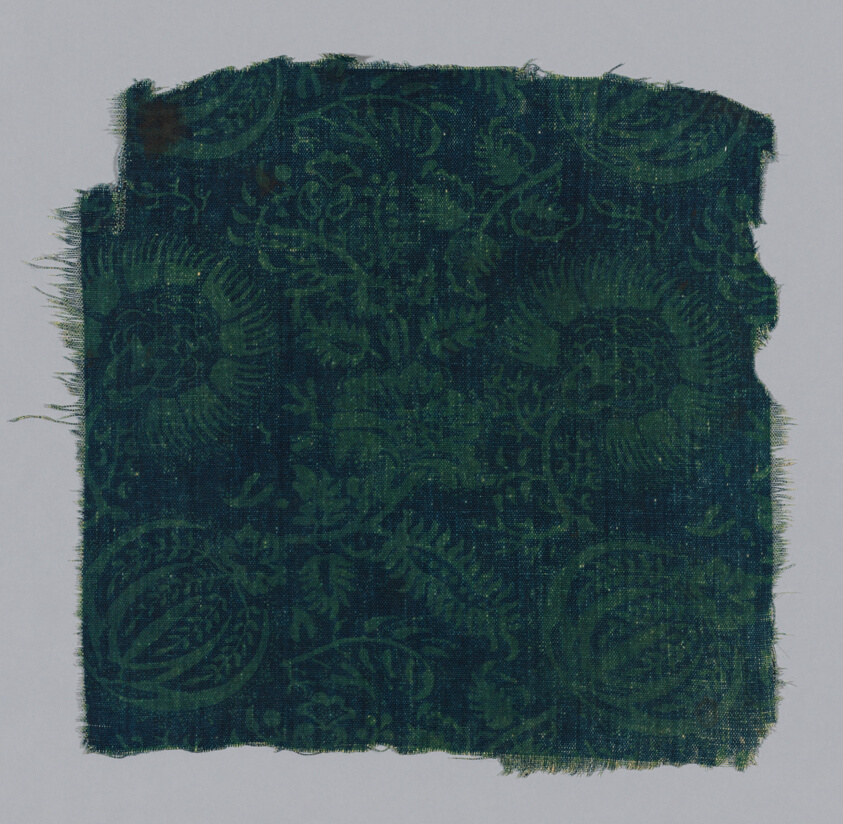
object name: Textile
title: Fragment (Chair Seat Cover)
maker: Austria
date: c. 1820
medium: Linen and cotton; printed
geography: Austria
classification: textile; weaving - printed